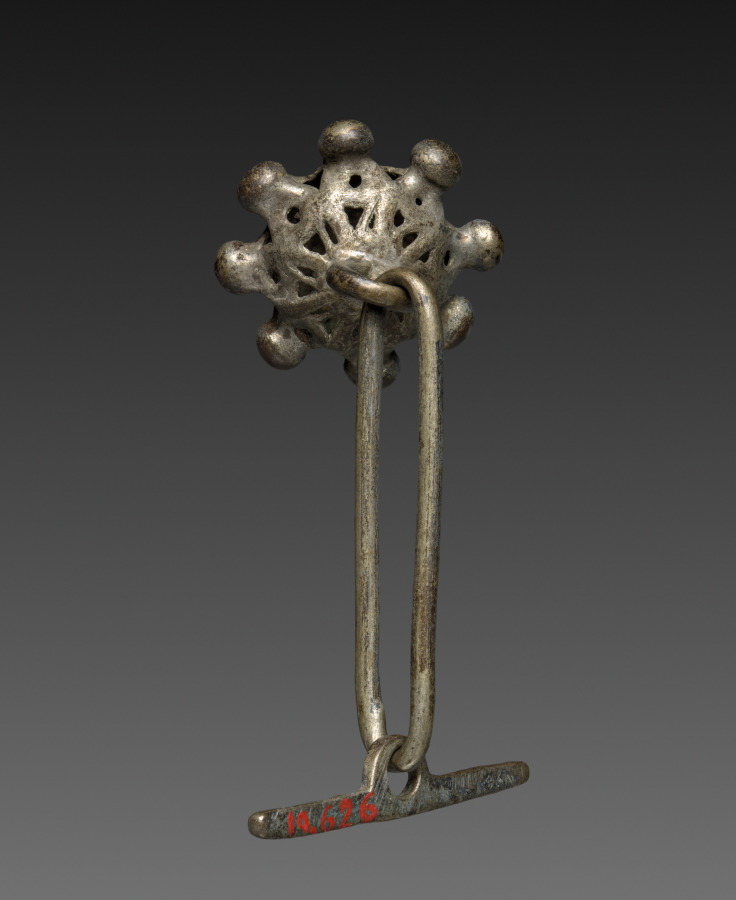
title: Button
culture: Italy, Sardinia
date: 1800s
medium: silver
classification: Jewelry